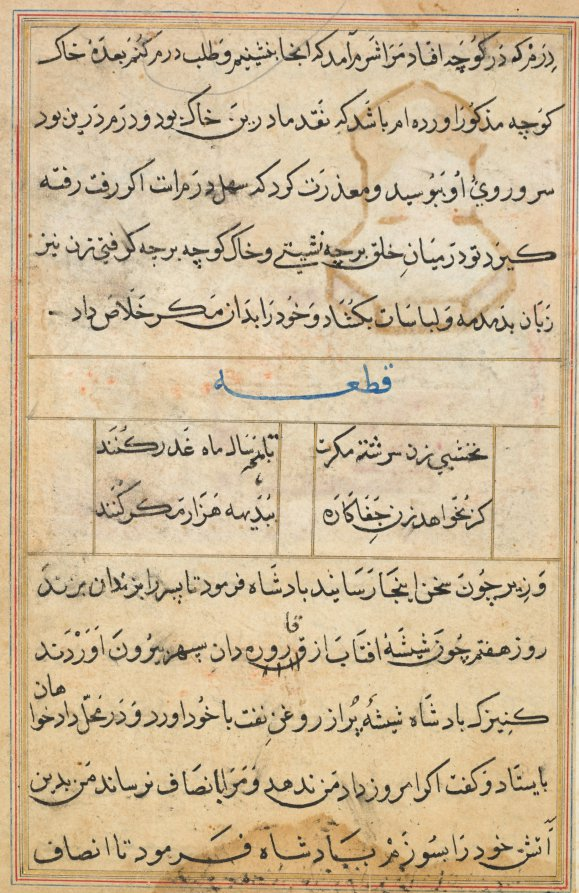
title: Page from Tales of a Parrot (Tuti-nama): text page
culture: Mughal India, court of Akbar (reigned 1556–1605)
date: c. 1560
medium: gum tempera, ink, and gold on paper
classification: Painting